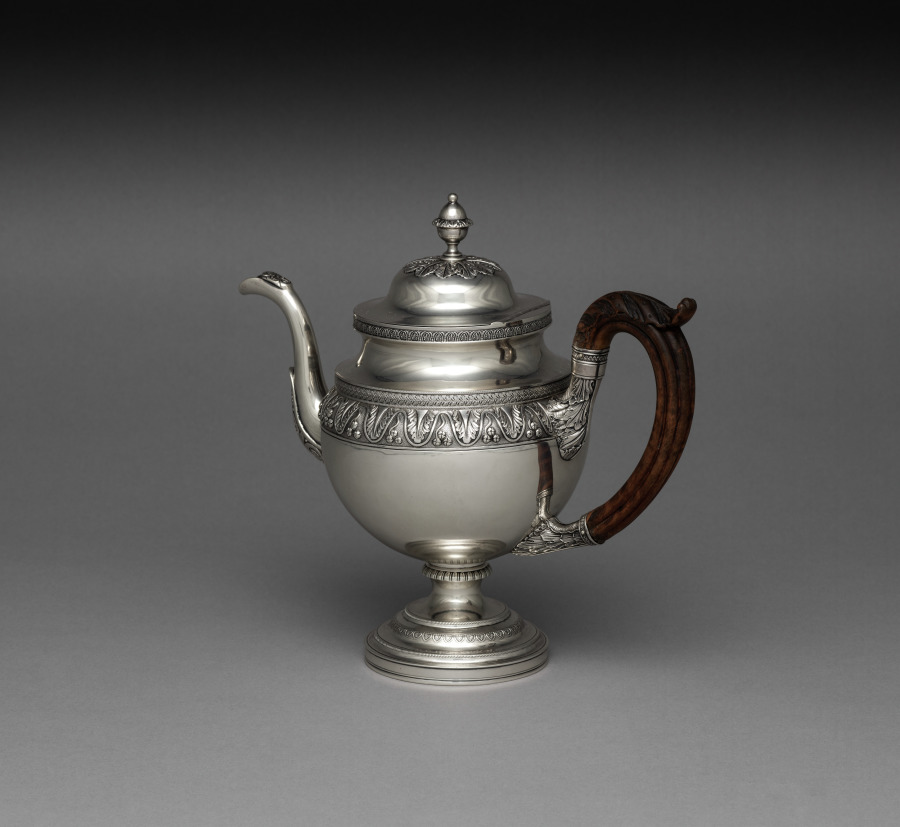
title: Covered Pot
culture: America, Pennsylvania, Philadelphia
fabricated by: Harvey Lewis (American, 1835)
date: c. 1811–25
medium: silver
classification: Silver